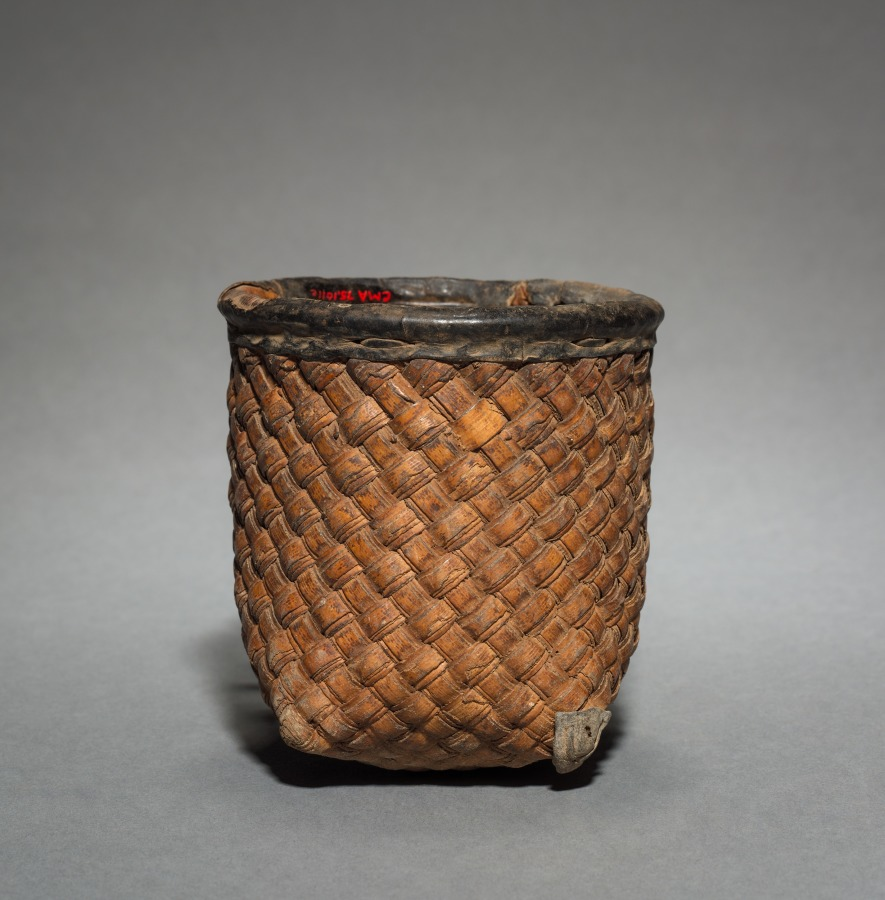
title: One of Ten Nesting Wedding Baskets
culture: Africa, Western Africa, Burkina Faso, Lobi–style maker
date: c 1900s ?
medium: Plant fiber and leather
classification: Vessels